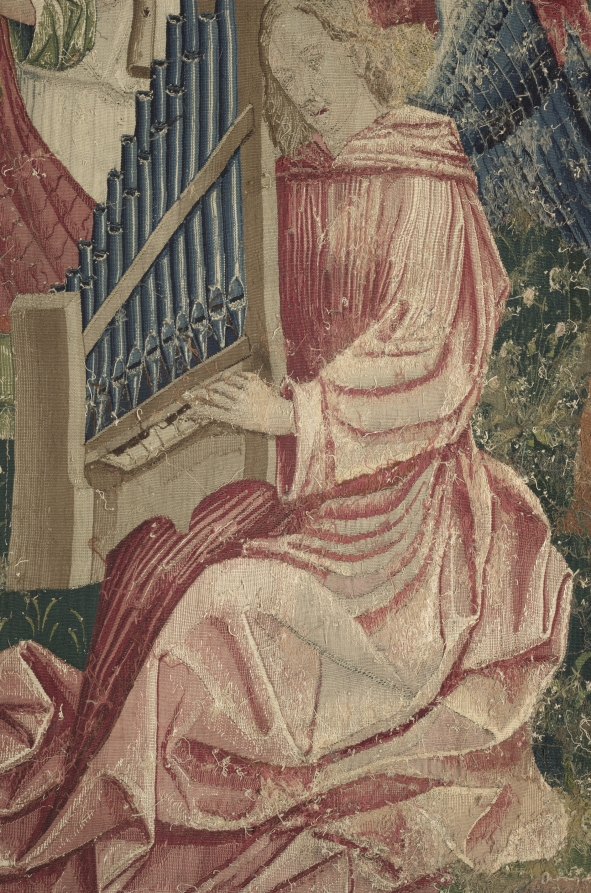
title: The Triumph of Eternity (from Chateau de Chaumont set)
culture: France, Lyon(?), early 16th century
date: 1512–15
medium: silk and wool; tapestry weave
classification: Tapestry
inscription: French verse in Gothic letters translates as follows: "Nothing triumphs by right authority, Unless it be conducted by Eternity. Nothing is permanent beneath the firmament, But above us triumphs Eternity."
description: The Triumph of Eternity is represented by the Coronation of the Virgin. Dressed in crimson velvet with an opulent brocaded velvet shawl, the Virgin is seated in the center as two angels hold a crown over her head. Five musical angels surround her playing an organ, recorder, straight cornetto, harp, and lute, while another sings from an open music book. The scenes in the set display a conservative style in which the figures are placed in shallow landscapes, thereby ignoring pictorial innovations for depicting space and mass. The verse in Old French at the top states: Nothing triumphing by due authority Remains permanent and durable. Nothing is permanent under the heavens, But above, eternity triumphs.